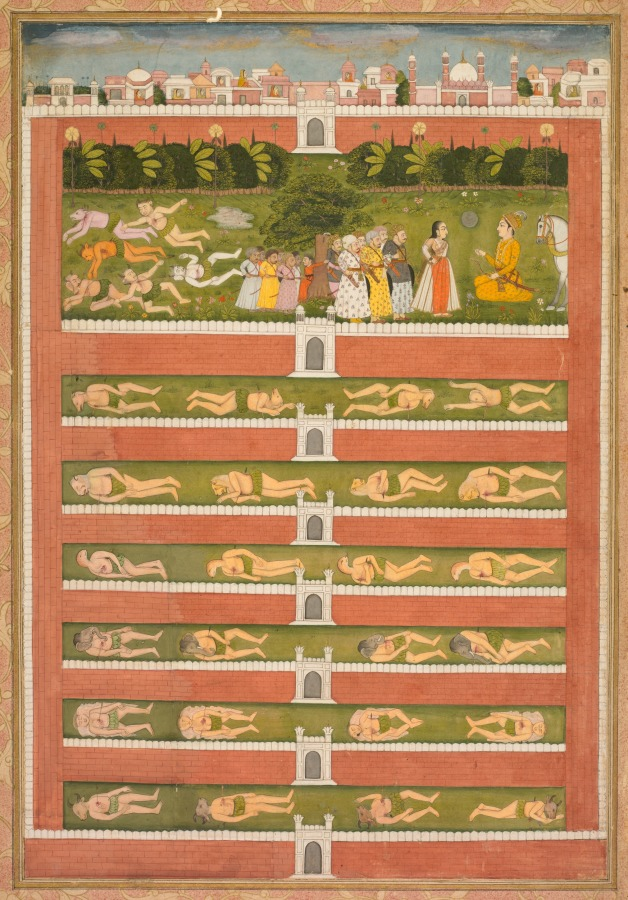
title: A Princess and Demons before a Nobleman: A Leaf from a Poetical Romance Relating to Shah Alam I (recto); Stenciled Scenes of Lion and Gazelle (verso)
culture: Mughal India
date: c. 1710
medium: Gum tempera, ink, and gold on paper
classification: Painting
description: The source story of this painting remains enigmatic to scholars, but it includes a range of depictions of the “other”––from the foreign to the demonic. A prince kneeling in front of his horse addresses a lady; the moon in front of her face may identify her as Mahliqa (“moonlike” in Arabic), the Chinese princess identified by inscription on the adjacent page. A group of men whose eyes hang vertically stand behind her. Horned figures with grass skirts lie slain behind them, presumably killed by the kneeling prince conspicuously holding a bow. The city in the background, at the top of the painting, is populated solely by women, and its eight surrounding walls are interspersed with slain composite creatures wearing leaf skirts, which may identify them as bands of forest-dwellers, or tribal groups.